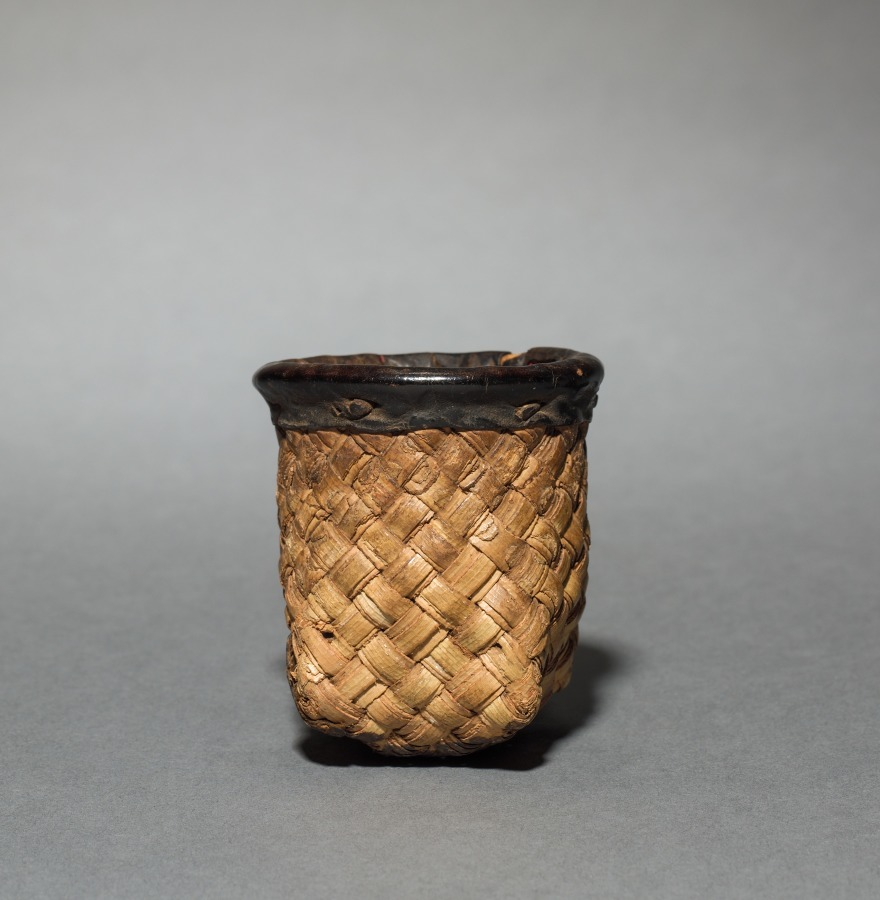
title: One of Ten Nesting Wedding Baskets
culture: Africa, Western Africa, Burkina Faso, Lobi–style maker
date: c 1900s?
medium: Plant fiber and leather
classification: Vessels